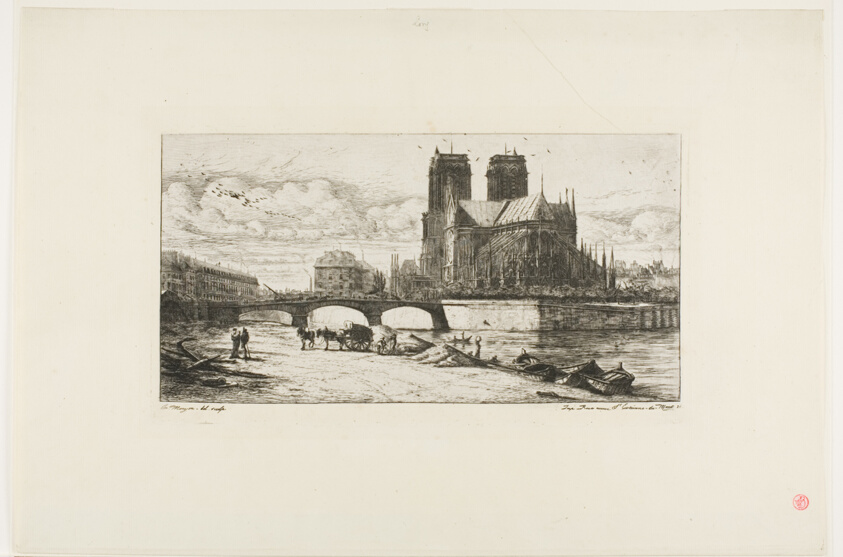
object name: Print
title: The Apse of Notre-Dame, Paris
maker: Charles Meryon (French, 1821-1868)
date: 1854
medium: Etching and drypoint on ivory chine laid down on ivory wove paper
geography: France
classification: etching; print; prints and drawing